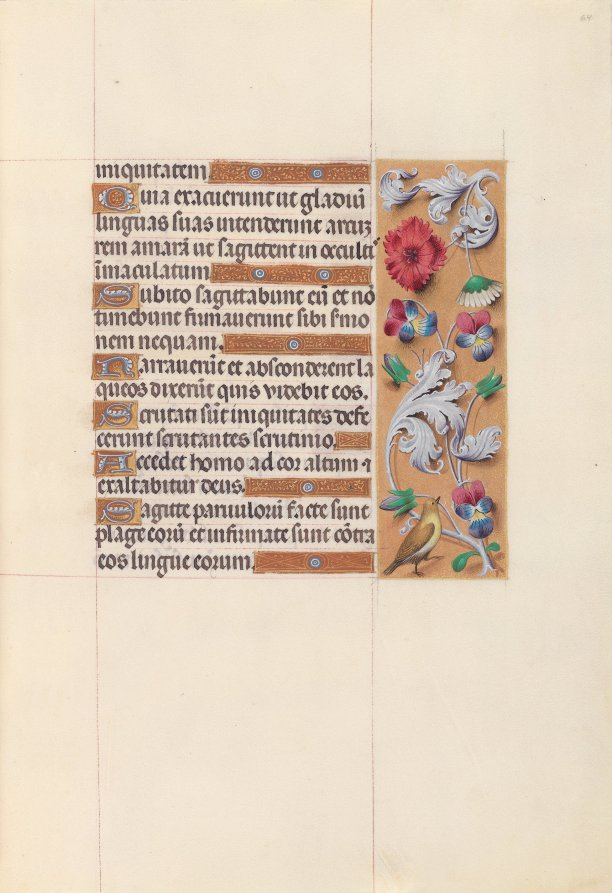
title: Hours of Queen Isabella the Catholic, Queen of Spain: Fol. 64r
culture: Flanders, Ghent and Bruges, late 15th century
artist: Master of the First Prayerbook of Maximillian (Flemish, c. 1444–1519)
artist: and Associates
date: c. 1500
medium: ink, tempera, and gold on vellum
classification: Bound Volume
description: This manuscript was illuminated by a circle of at least five highly organized manuscript painters active in the Flemish cities of Ghent and Bruges. The principal illuminator was Alexander Bening, who painted the majority of the book's miniatures. Manuscripts produced by this circle of artists are renowned for the decoration of their borders, which typically feature a rich variety of realistically-painted flowers, birds, and butterflies. This prayer book, called a book of hours, was intended not for a cleric, but for the private devotions of a lay person-in this case, Isabella the Catholic, Queen of Spain (1451-1504). Isabella's coat of arms embellishes the book's frontispiece. It is unlikely that the book was commissioned by the Queen herself; rather, she probably received it as a diplomatic gift from someone courting her patronage, perhaps Cardinal Francisco Jimenez de Cisneros. A Franciscan friar, Jimenez was dependent upon Isabella for his advancement, first to the post of Queen's confessor in 1492, and then to Archbishop of Toledo in 1495.